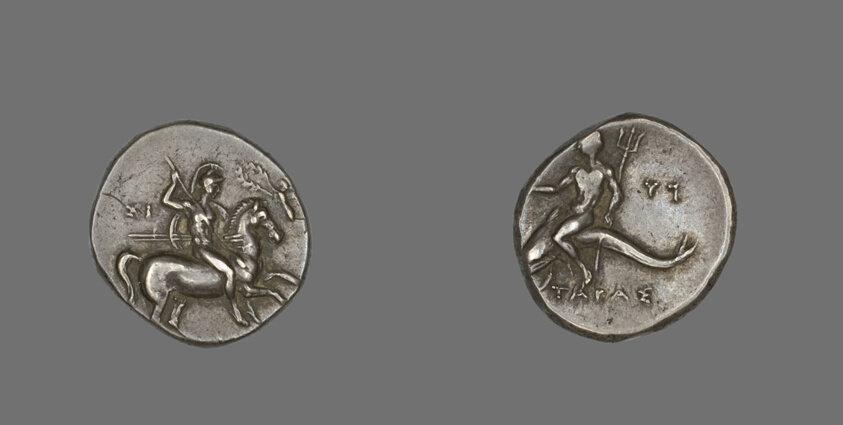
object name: Coin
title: Stater (Coin) Depicting a Horseman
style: greek, ancient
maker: Greek, minted in Tarentum, Calabria, Italy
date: 334-302 BCE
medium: Silver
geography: Taranto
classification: coin; ancient art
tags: mythological figures, dolphins, horseback riding, horse